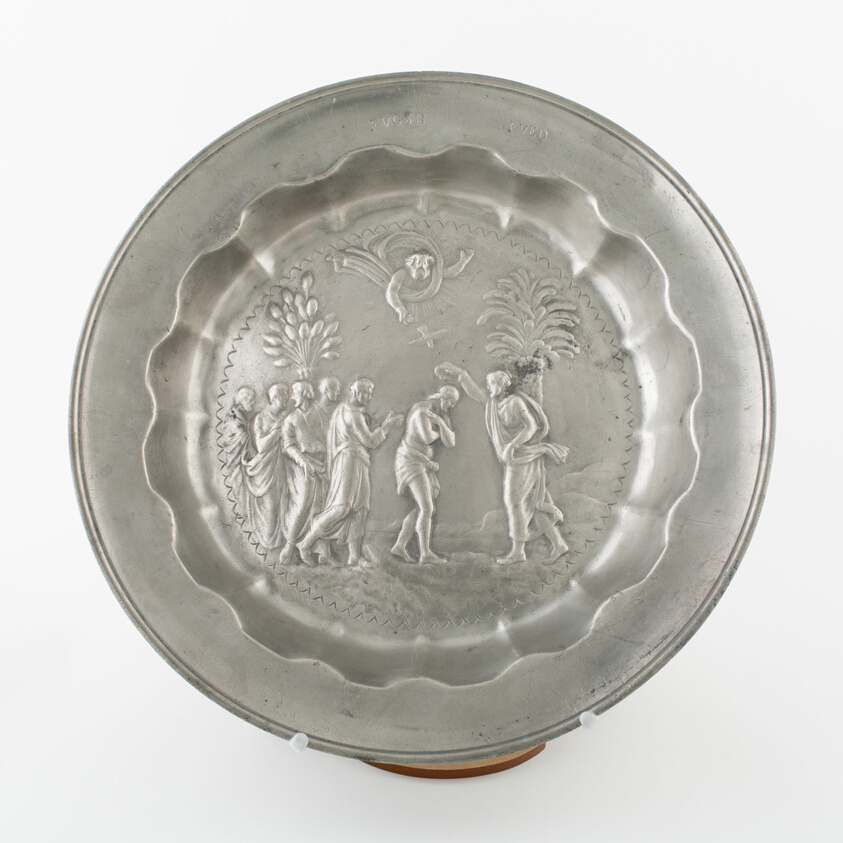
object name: Metalwork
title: Alms Dish with Baptism of Christ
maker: Netherlands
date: c. 1800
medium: Pewter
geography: Netherlands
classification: liturgical; pewter; metalwork; european decorative arts